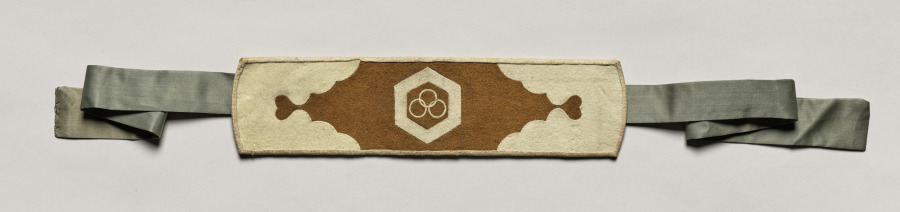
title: Sash for a Firefighter's Suit (Kaji shōzoku)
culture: Japan, Edo period (1615–1868)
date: late 1700s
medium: Wool (rasha); applique and silk and gold thread cord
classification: Textile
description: Wood architecture in densely populated areas made firefighting a frequent occurrence in the Edo period (1615–1868). Jackets made of leather or wool offered firefighters protection against the flames. Wool was imported from Europe. The jacket's triple ring crest in white is of the “three alternating rings” (mitsurin chigai) type framed in a tortoise shell (kikko) motif, and identified the house with which the wearer was affiliated.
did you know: Wool has self-extinguishing properties that protect the wearer from fire.